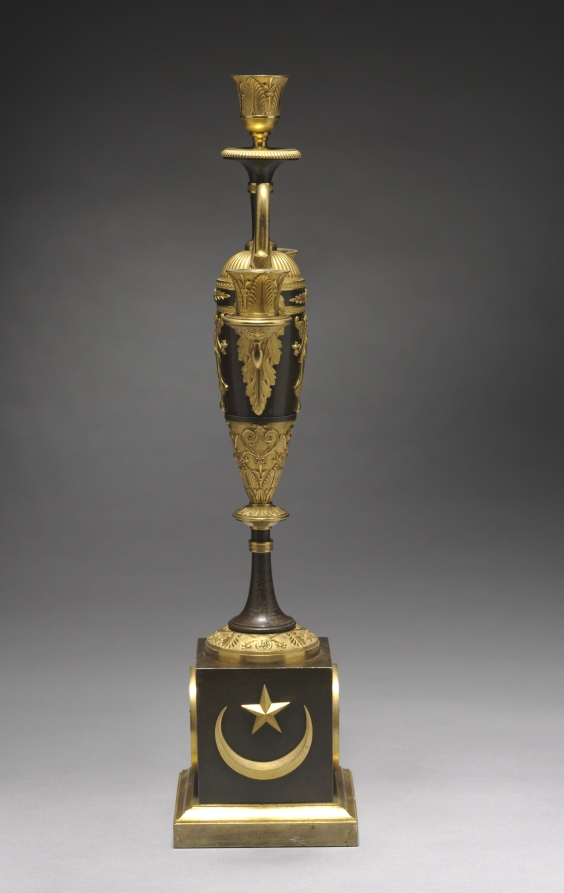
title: Candelabrum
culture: France, late 18th-early 19th century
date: c. 1800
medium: gilt and patinated metal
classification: Furniture and woodwork